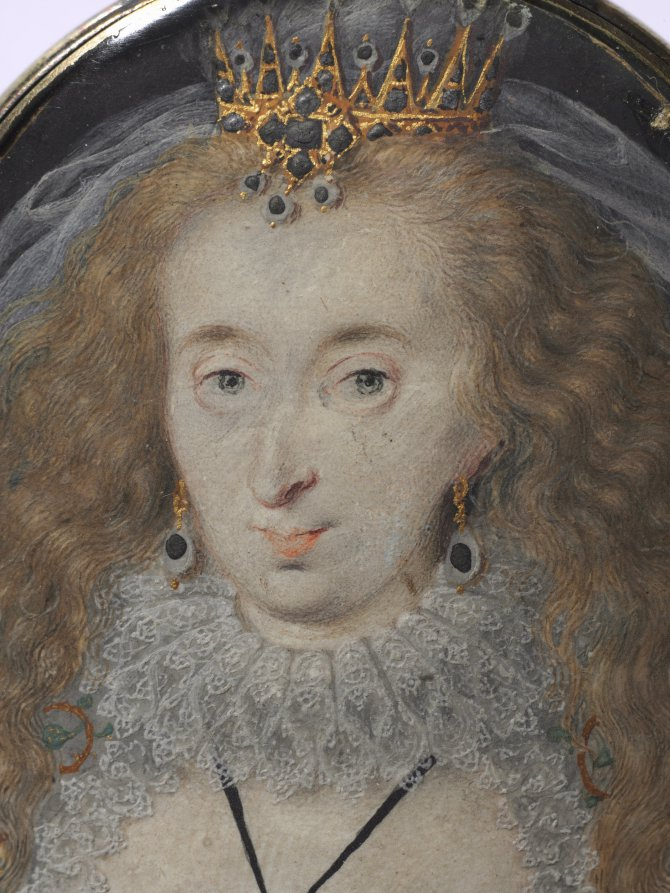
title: Portrait of Lucy Russell, Countess of Bedford, née Harrington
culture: England, early 17th century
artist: Isaac Oliver (French, c. 1565–1617)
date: c. 1608–1616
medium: watercolor on vellum with gold and silver in a 17th-century silver gilt frame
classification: Portrait Miniature